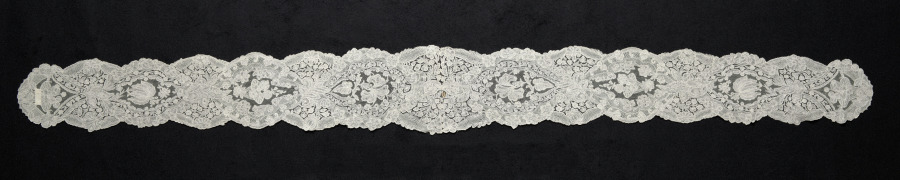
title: Lace Lappet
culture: Belgium, Brussels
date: 1700s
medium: Linen: bobbin lace (Point d'Angleterre)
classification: Lace